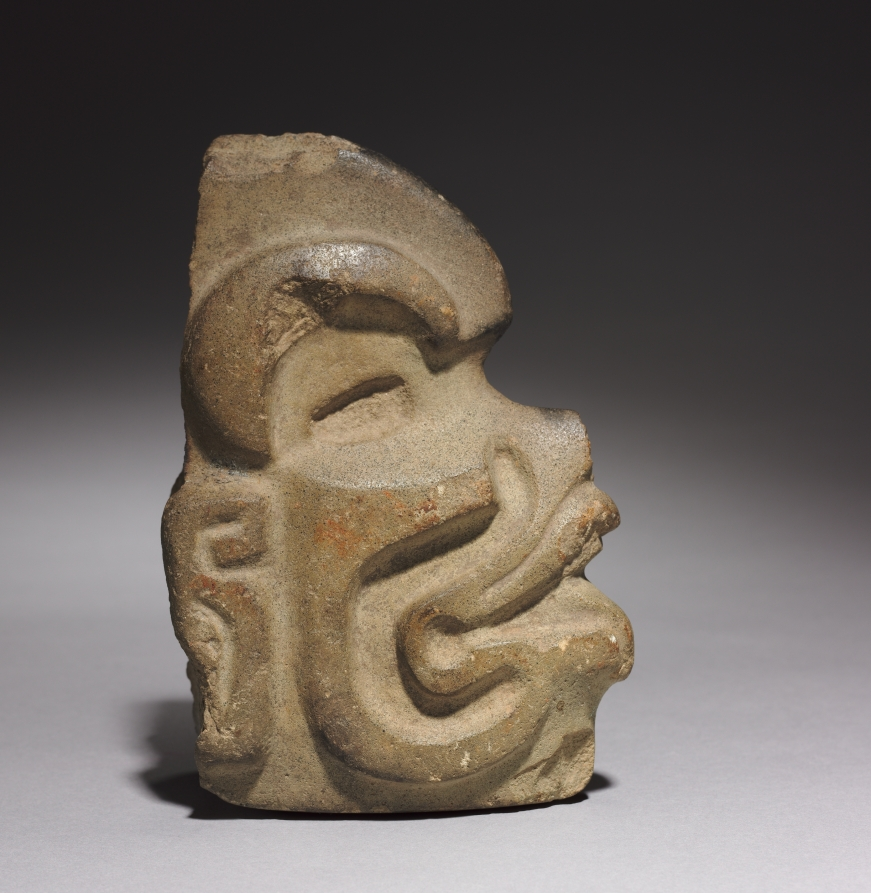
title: Head-Shaped Hacha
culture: Mexico, Isthmus of Tehuantepec(?), Coastal Lowlands style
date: 400–950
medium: stone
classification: Sculpture